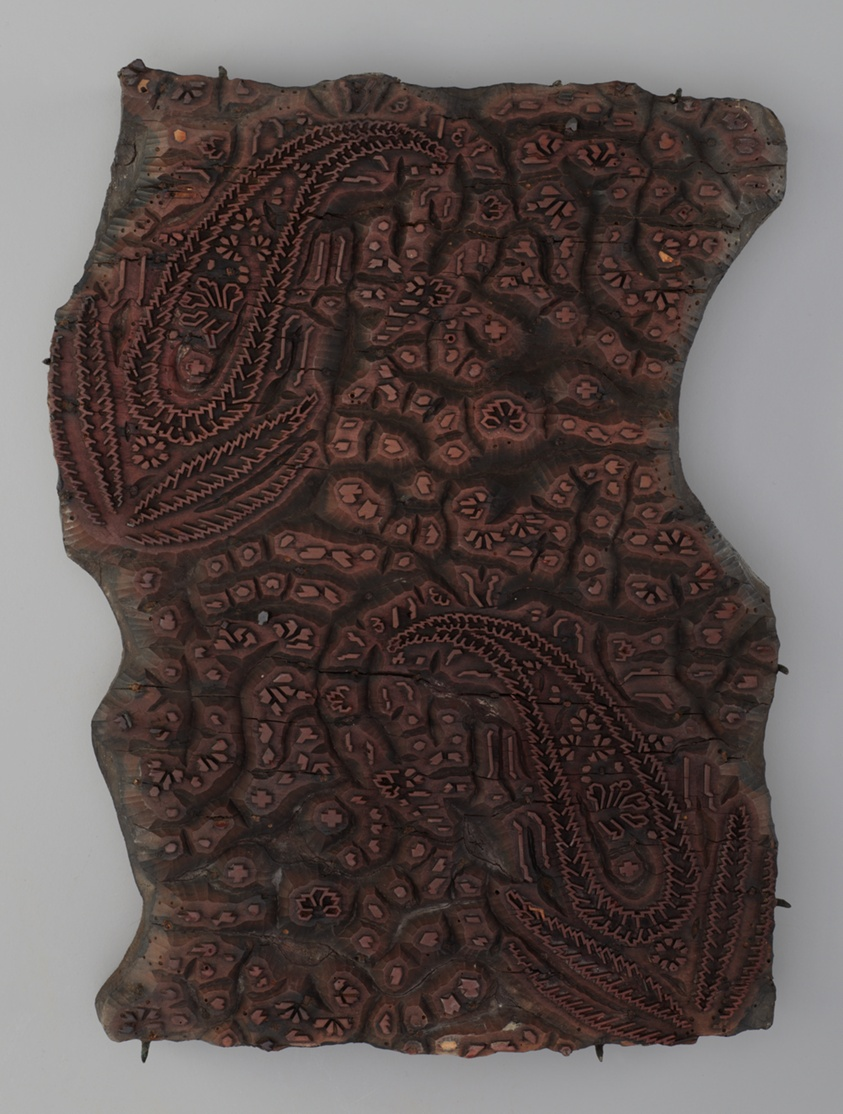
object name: Textile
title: Six Printing Blocks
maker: England or France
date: before 1850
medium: Carved wood, treated in a variety of techniques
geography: England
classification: printing blocks (printing surfaces); textile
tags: paisley